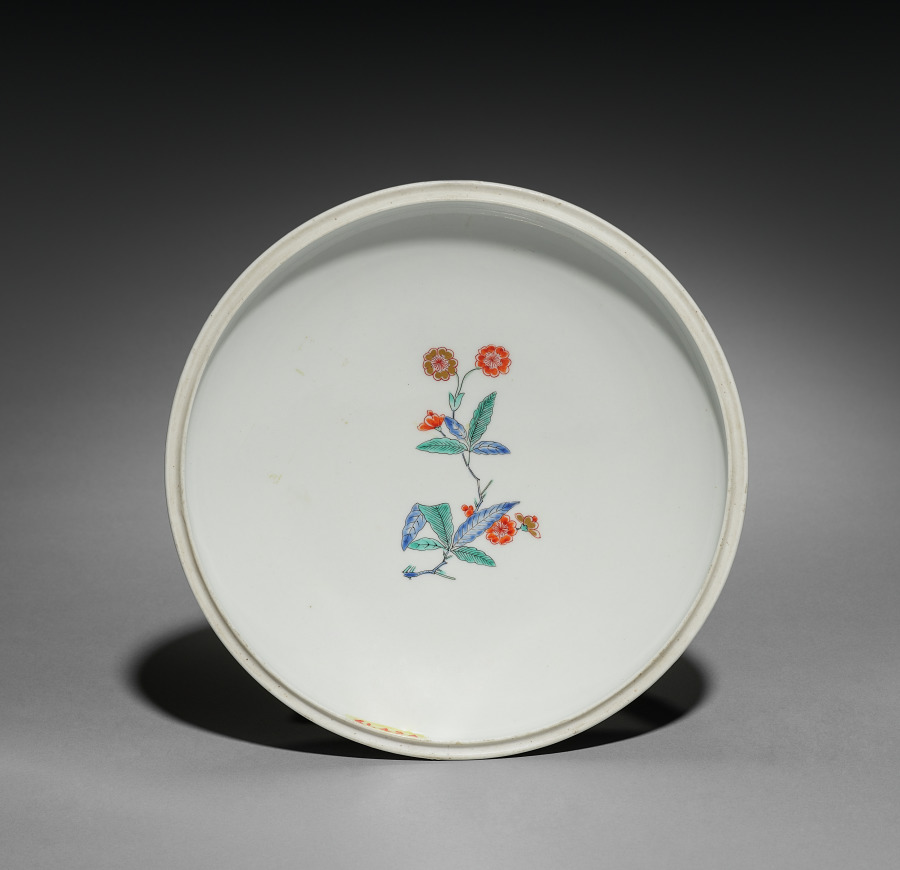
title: Covered Bowl with Chrysanthemums and Chidori: Kakiemon Ware (cover)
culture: Japan, Edo period (1615–1868)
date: early 1700s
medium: porcelain with decoration in colored enamels; molded design of waves on exterior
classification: Ceramic